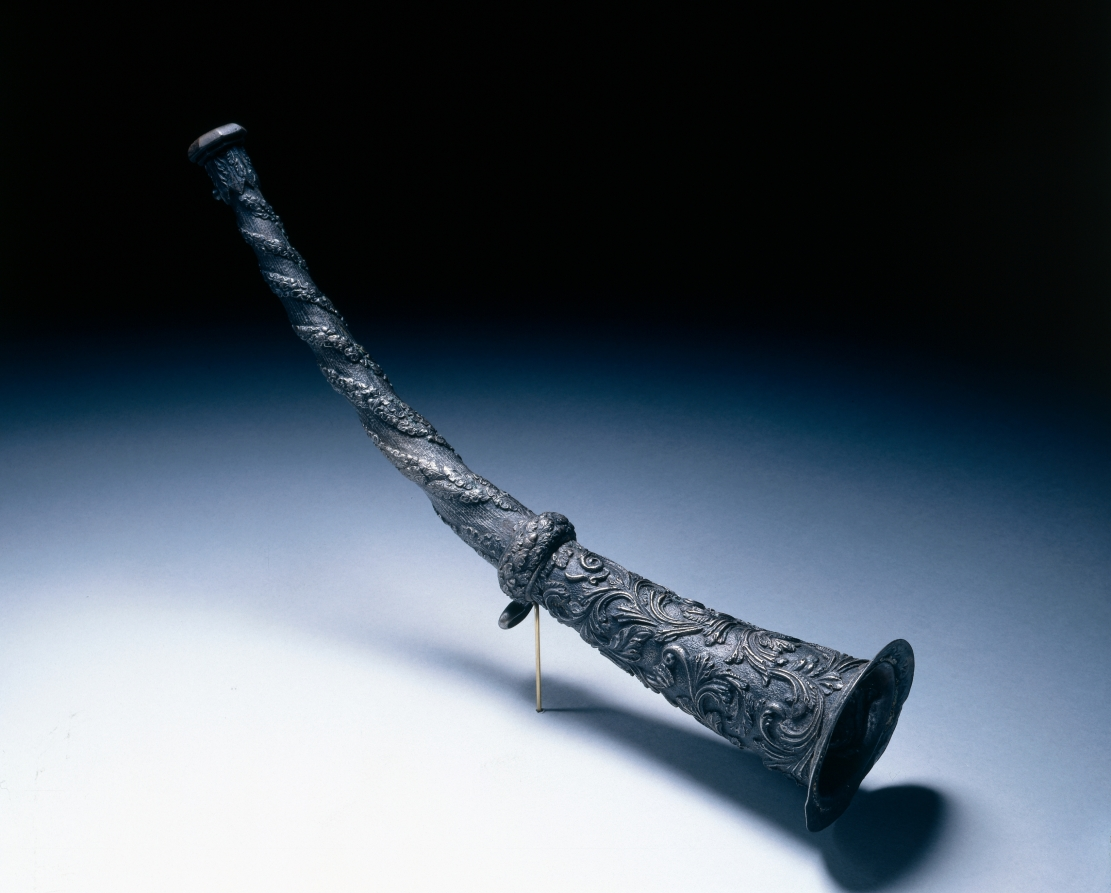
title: Hunting Horn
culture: Italy, late 16th-early 17th century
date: c. 1675–1725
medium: steel, embossed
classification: Arms and Armor